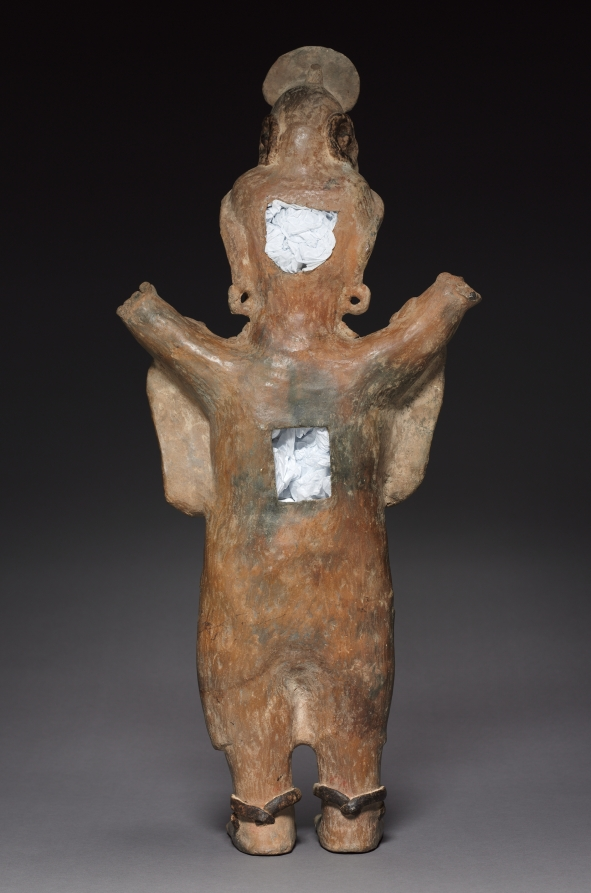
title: Standing Female Figure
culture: Mexico, Veracruz, Veracruz Monumental Sculpture type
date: 600–900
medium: burnished pottery with orange slip, traces of red and white pigment, and asphalt paint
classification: Sculpture